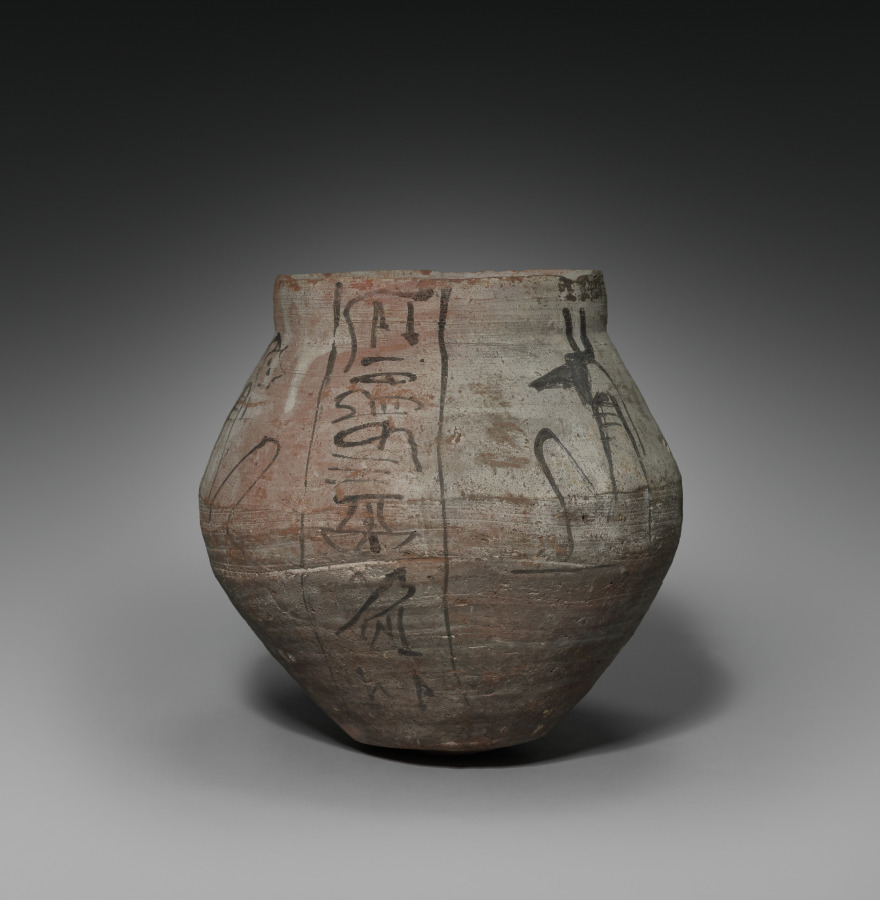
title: Shawabty Jar with Lid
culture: Egypt, New Kingdom (1540–1069 BCE), Dynasties 19–20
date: 1295–1069 BCE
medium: Nile silt ware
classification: Funerary Equipment